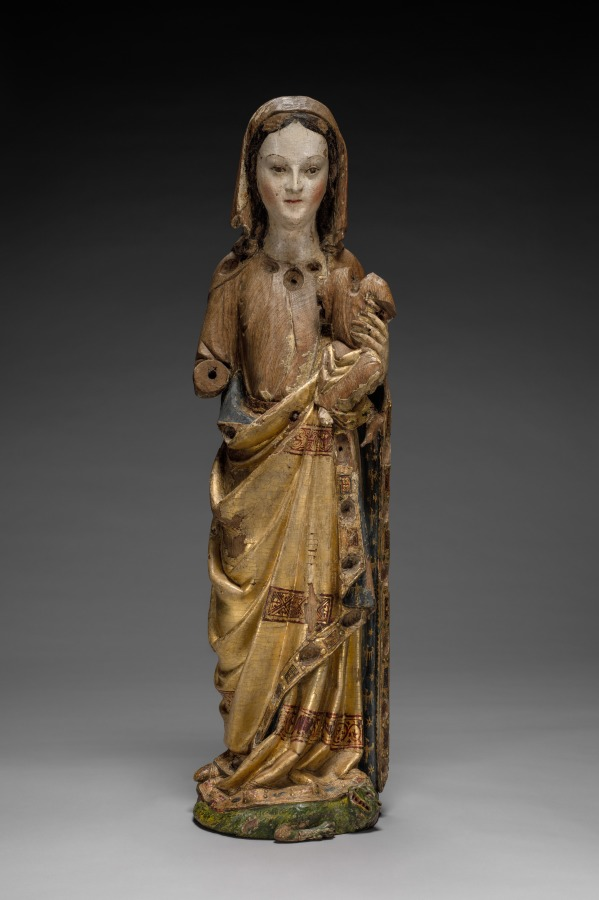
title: Virgin and Child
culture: Mosan (Valley of the Meuse), Liège(?), late 13th century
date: late 1200s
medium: wood (oak) with polychromy and gilding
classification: Sculpture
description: This sculpture is a rare survival in wood from the valley of the Meuse River (modern Belgium and Holland), an important region for the production of ecclesiastical art in the 1100s and 1200s. The elegantly draped figure is remarkable for the preservation of much of its original paint and gilding, including the Virgin's gilded mantle highlighted with decorative bands of geometric patterns and the green dragon on which she stands. There are small settings around the Virgin's neck and along the border of the mantle that would have originally been set with gem and glass cabochons in imitation of the richly adorned metalwork for which Mosan art was highly esteemed. The settings for these cabochons provide some hint of the original opulence of this sculpture. The Virgin's serene features and beautiful countenance are noteworthy, as is the refined execution of the draperies.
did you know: Dragons, like the one Mary is standing on, sometimes look more like snakes in medieval art.